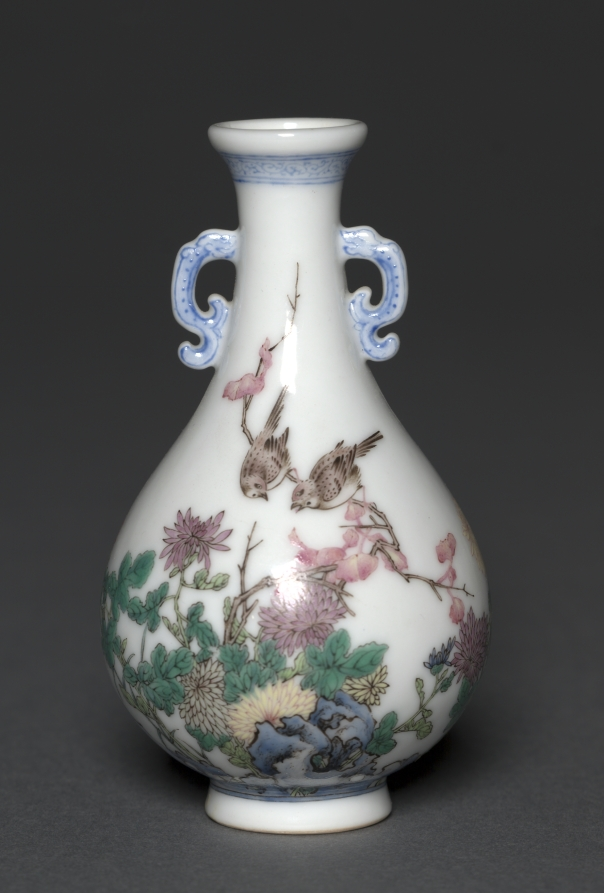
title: Miniature Vase with Birds and Chrysanthemums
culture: China, Jiangxi province, Jingdezhen kilns, Qing dynasty (1644-1911), Qianlong mark and reign (1736-95)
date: 1736–95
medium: porcelain with famille rose overglaze enamel decoration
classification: Ceramic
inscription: 乾隆年製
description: In the Qing dynasty (1644–1911), imperial patronage and a growing urban population encouraged consumption of luxury goods and local craftmanship. Luxury items became more affordable to larger parts of the society, including women, merchants, and literati in nonofficial positions. This miniature porcelain vase with famille rose overglaze enamel decoration illustrates some of the highest technical accomplishments in Qing porcelain production.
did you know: Green, pink, lavender, light lemon yellow, blue, and brown enamels were skillfully applied to this miniature vase.